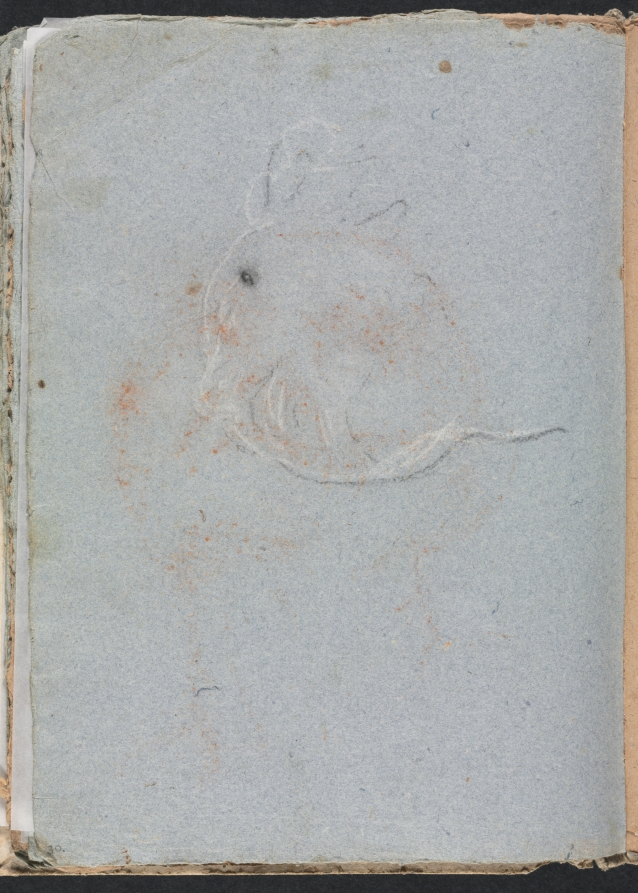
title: Verona Sketchbook: Head (page 30)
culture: Italy, 18th century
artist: Francesco Lorenzi (Italian, 1723–1787)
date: 1760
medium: black chalk with white heightening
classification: Bound Volume